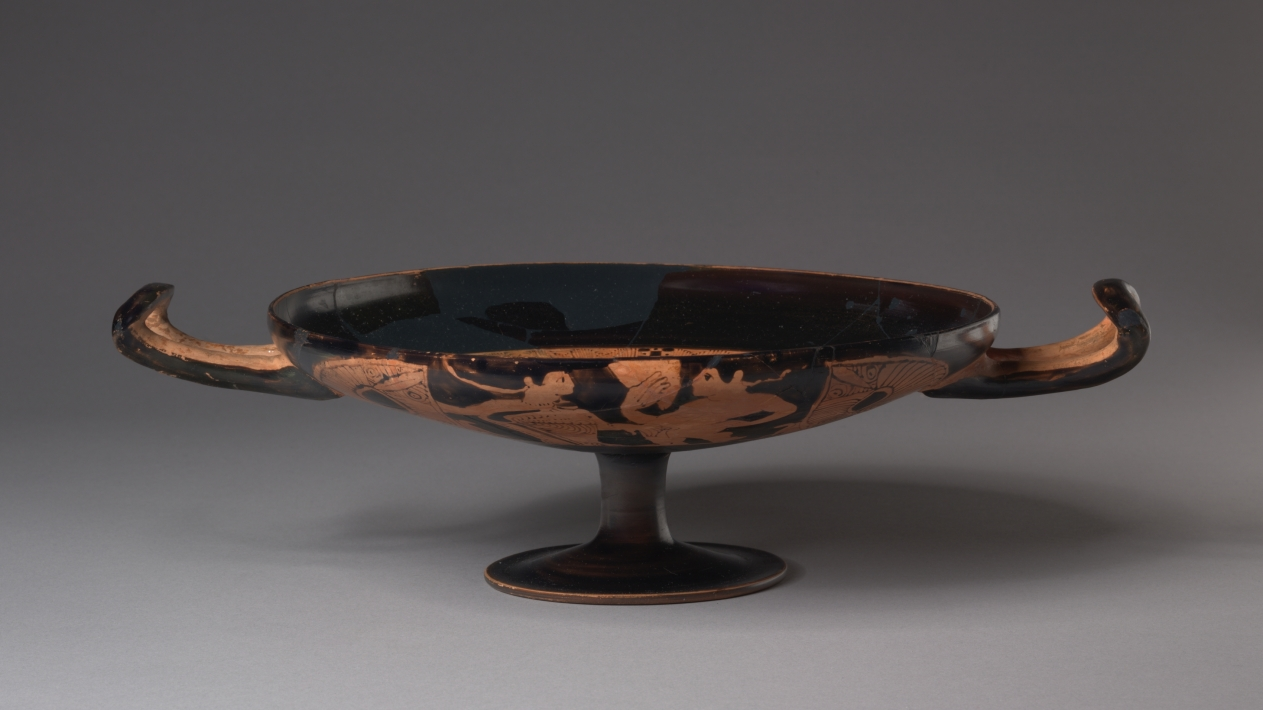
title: Red-Figure Kylix (Drinking Cup): Artemis and Stag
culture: Etruscan or Faliscan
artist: attributed to Clusium Group (Etruscan or Faliscan)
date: c. 350 BCE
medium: ceramic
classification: Ceramic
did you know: The interior of this cup contains a scene of Artemis subduing a spotted deer.